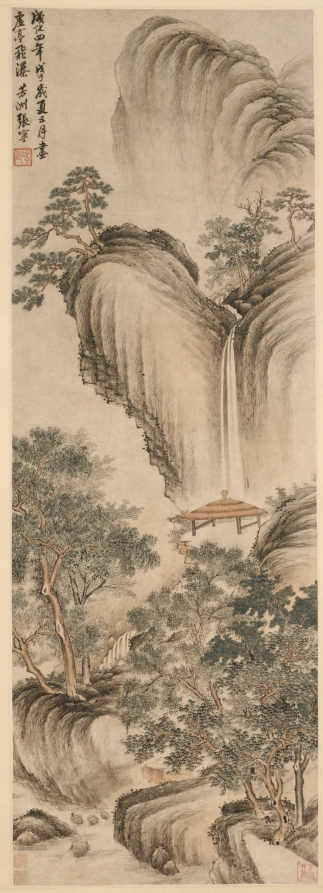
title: Empty Arbor and Rapid Waterfall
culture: China, Ming dynasty (1368–1644)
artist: Zhang Ning (Chinese, 1426-c. 1495)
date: 1468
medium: hanging scroll, ink and color on paper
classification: Painting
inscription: Artist's inscription, signature, and 2 seals: Painted in the summer, the fifth month of the wu-tzu year, the fourth year of the Ch'eng-hua era [1468]. Empty Arbor and Rapid Waterfall. Fang-chou, Chang Ning [seals] Ching-chih; Fang-chou ts'ao-t'ang. 2 additional seals: 1 of Ch'eng Ch'i; 1 unidentified.